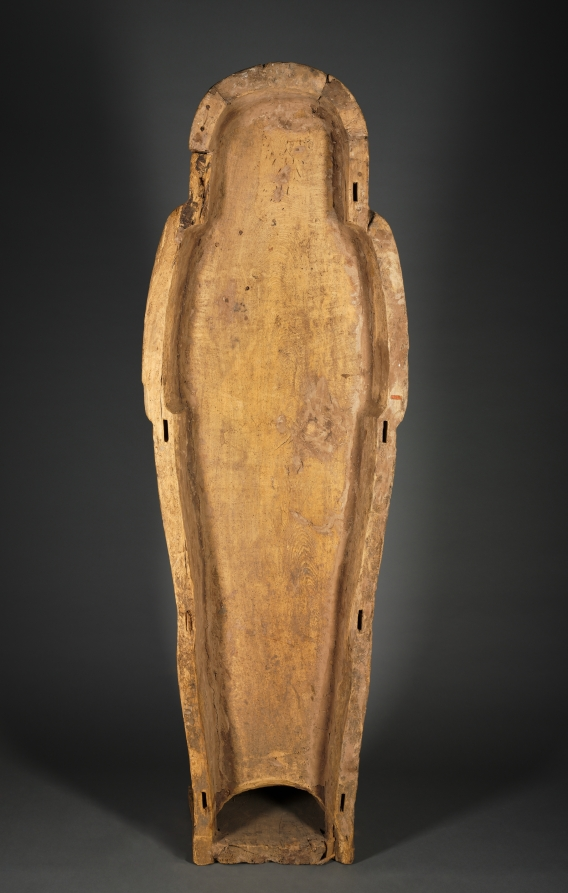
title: Coffin of Bakenmut (lid)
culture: Egypt, Thebes, Third Intermediate (1069–715 BCE), Dynasties 21–22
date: c. 1000–900 BCE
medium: gessoed and painted sycamore fig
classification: Funerary Equipment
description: The coffin of Bakenmut is one of the finest examples of painted wooden coffins made for the priests of Amen and their families at Thebes during Dynasty 21 and early Dynasty 22. The pharaohs of this time were no longer buried in the Valley of the Kings, but instead built tombs in the Delta, far to the north, where they resided. Security was lax in the Theban necropolis. The coffins and funerary goods of the wealthy citizens of Thebes were placed in unmarked and undecorated family tombs cut into the cliffs on the west bank of the Nile. All the care and detail that in more prosperous times were devoted to the decoration of the tomb chapel were now lavished on the elaborately painted coffins. Every available surface is crowded with religious scenes, images of funerary gods and goddesses, protective spells, and magical symbols. The deceased appears mummiform. An elaborate floral collar entirely covers the upper body, exposing only the separately attached hands (now lost). A pair of red "mummy braces" are crossed over the chest, their point of intersection marked by a winged sun disk. The lower body is covered with tiny figures modeled in gesso against a yellow background, which gives the effect of gold inlaid with glass or semiprecious stone. The decoration on the interior features two deified dead kings of Dynasty 18. Although these rulers had lived centuries before, memory of their greatness was still very much alive. The main scene near the top depicts Tuthmosis III, the great military pharaoh, who lived 500 years before Bakenmut. Posed as a mummy, the ruler wears a brilliant feathered garment enfolding him with falcon’s wings. The scene below features back-to-back seated images of Amenhotep I, regarded as the patron of the Theban cemetery and worshiped as a local god there.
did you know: Originally another smaller coffin was placed inside this outer coffin and in that the deceased with a mummy board would have rested.